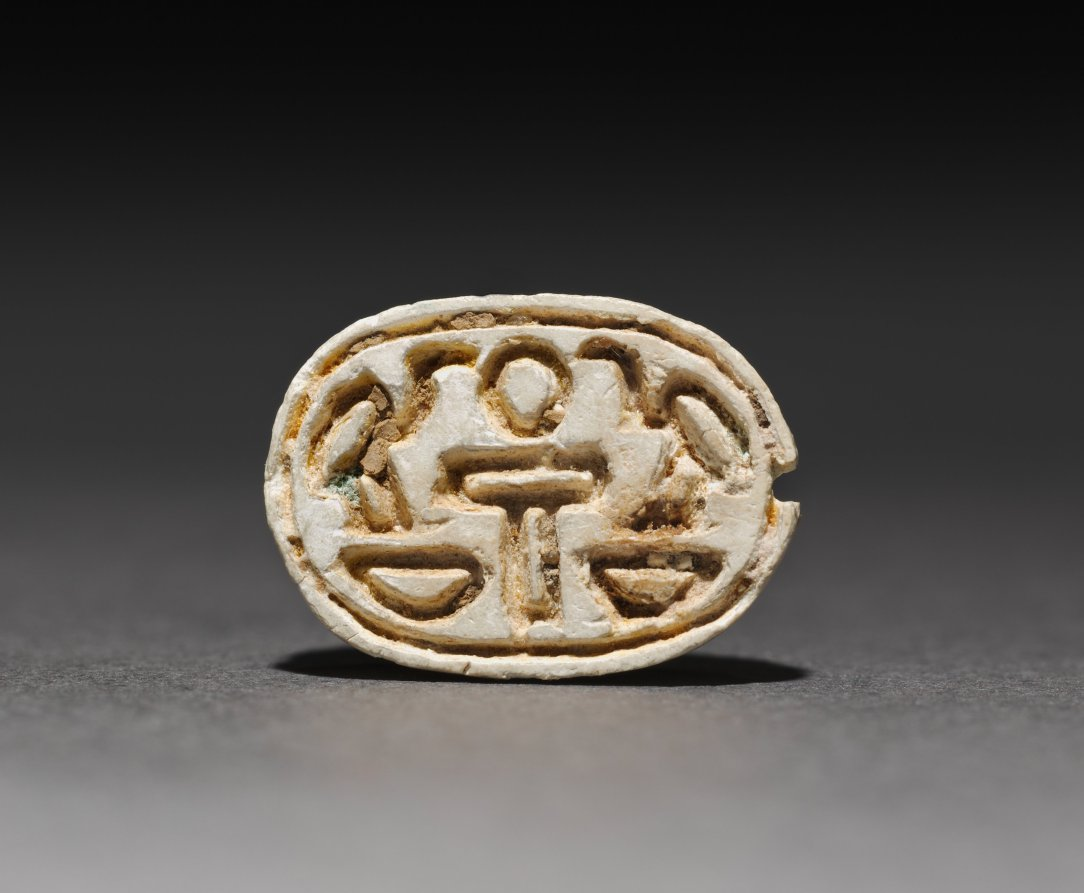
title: Scarab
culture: Egypt, Haraga, Wadi I, no number, Second Intermediate period (1648–1540 BCE)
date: 1980–1900 BCE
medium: turquoise-glazed steatite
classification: Scarabs